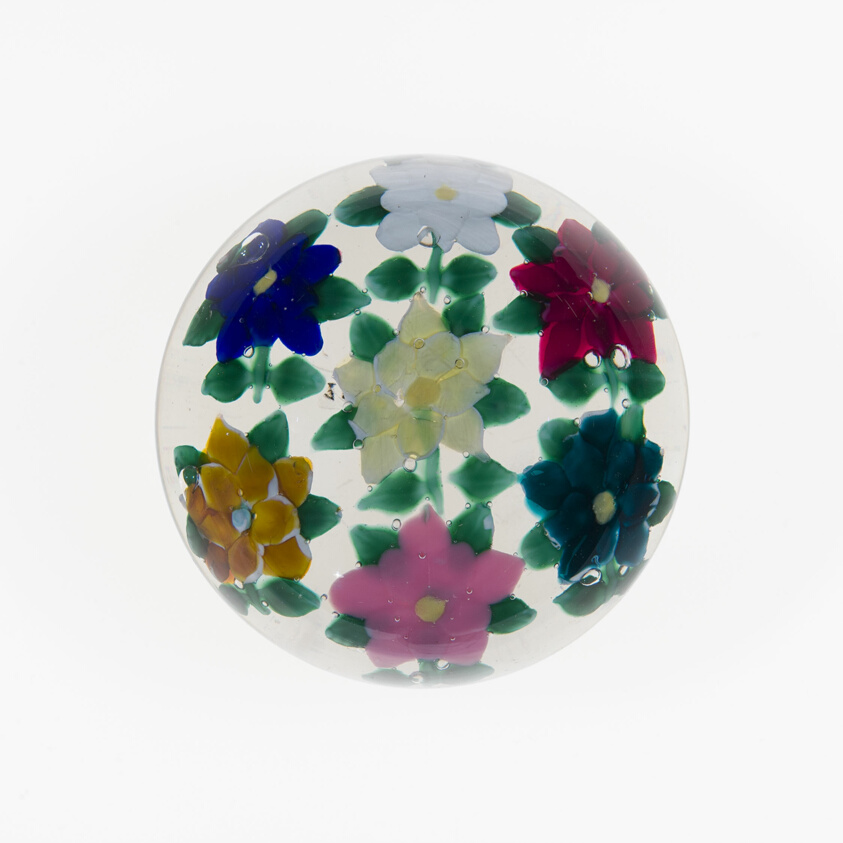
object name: Glass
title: Paperweight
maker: Possibly France or United States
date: 19th century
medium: Glass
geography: France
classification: paperweight; glass